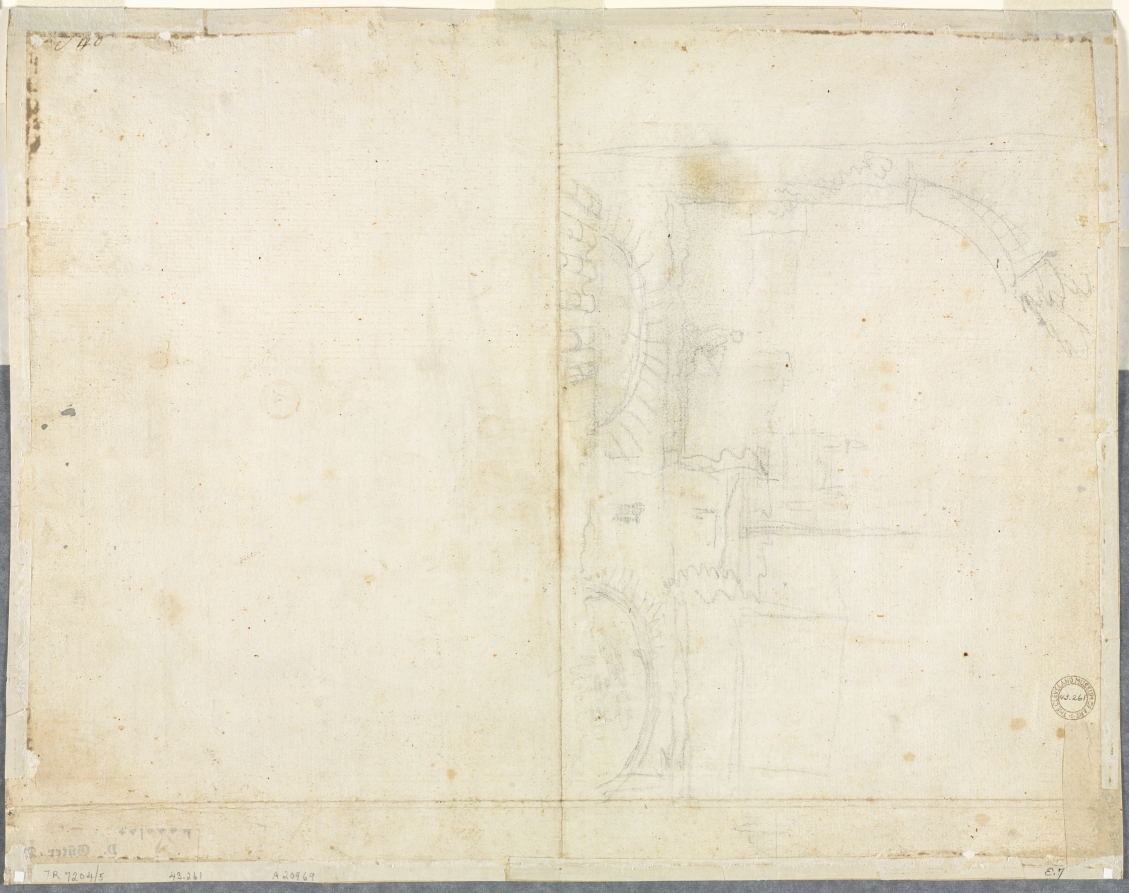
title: Sketch for San Giovanni in Laterano (verso)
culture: Flanders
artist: Lievin Cruyl (Flemish, c. 1640-c. 1720)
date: 1664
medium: graphite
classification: Drawing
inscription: upper right, in brown ink: [2?]S46 [partially masked] ; ON PAPER STRIP MOUNTED TO PERIMETER, lower left, in graphite: A20969 ; lower right, in graphite: E. 7